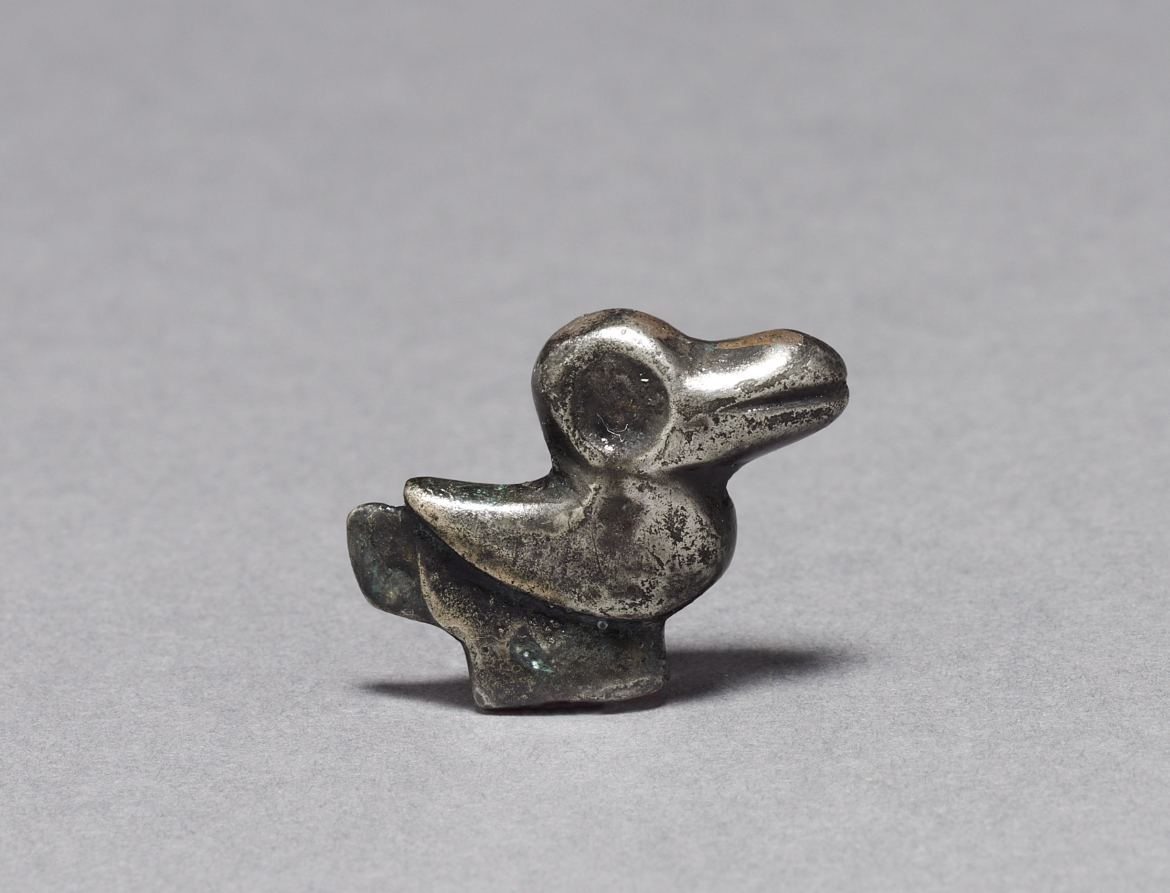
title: Bird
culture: Peru, Chimú (?)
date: 900–1200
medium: silver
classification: Metalwork